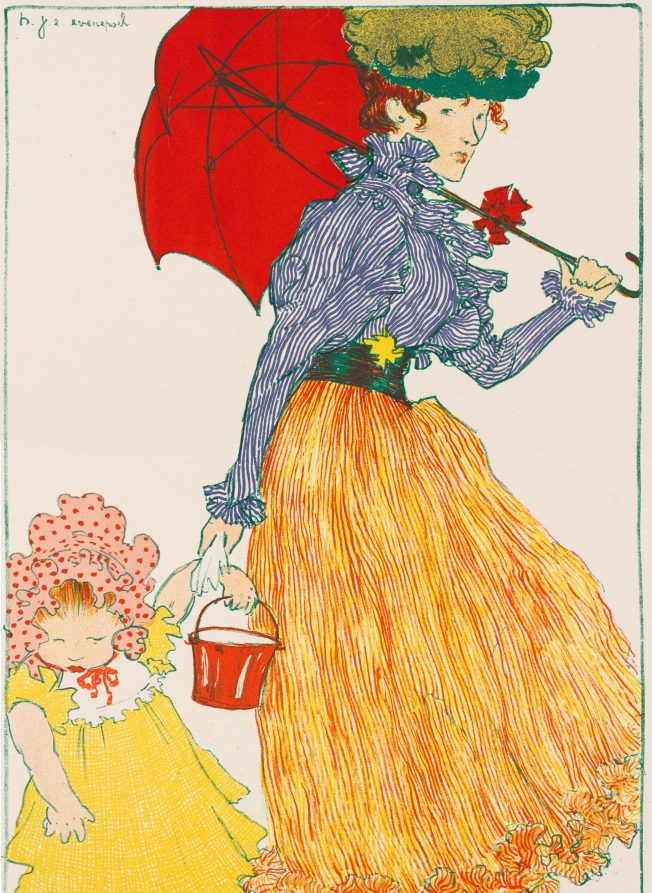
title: In the Square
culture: Belgium, 19th century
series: published in L'Estampe Moderne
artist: Henri Evenepoel (Belgian, 1872–1899)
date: 1897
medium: color lithograph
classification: Print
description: Evenepoel was born in Belgium but moved to Paris around 1890 and tragically died at the age of 27. In the Square was his only major print and was issued by L’Estampe Moderne (The Modern Print), a publication that released monthly portfolios of original prints in editions of 150. Such publications, which proliferated during the 1890s, helped popularize printmaking.